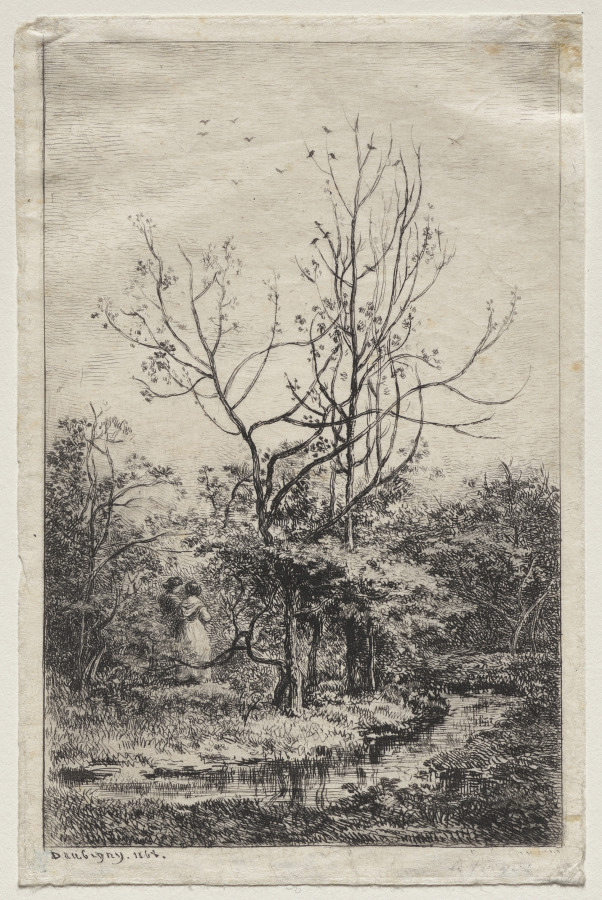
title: Le Verger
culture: France, 19th century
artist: Charles François Daubigny (French, 1817–1878)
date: 1868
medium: etching and drypoint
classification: Print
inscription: signed, lower left: Daubigny 1868